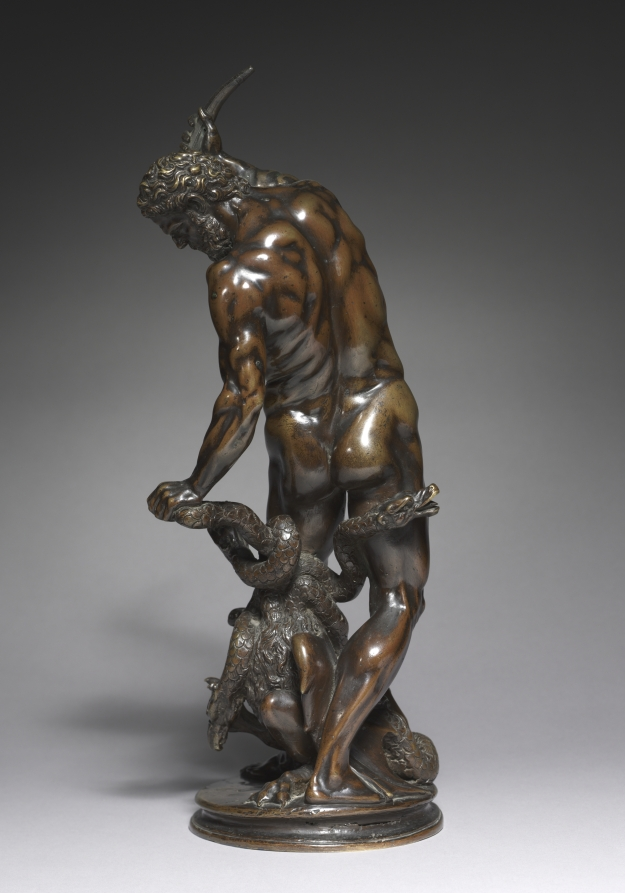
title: Hercules and the Hydra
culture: Northern Europe, late 16th-early 17th century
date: late 1500s-early 1600s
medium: bronze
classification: Sculpture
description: Hercules slayed the Lernean Hydra as the second of the ancient hero’s twelve labors. When one of the nine snake-like heads was destroyed, two grew back. Hercules cauterized each stump, allowing him eventually to kill the monster. The object he holds may have been a club, sword, sickle, or torch. The sinuous, scaly Hydra and the defined musculature presented challenging opportunities for sculptors working in bronze. The raw, tumultuous energy and twisting form-associated with artists of the late 1500s-contrasts to Jacopo Sansovino’s earlier Virgin and Child (1951.316).